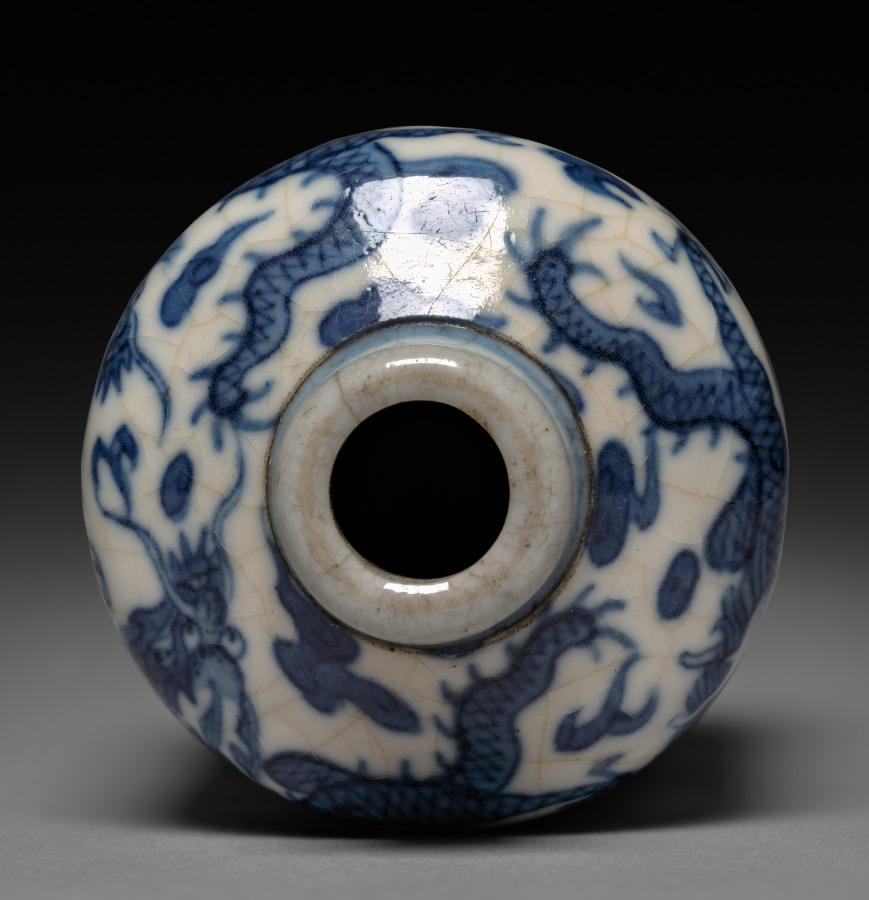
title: Snuff Bottle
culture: China, Qing dynasty (1644-1911), Kangxi reign (1662-1722)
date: 1662–1722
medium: porcelain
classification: Ceramic